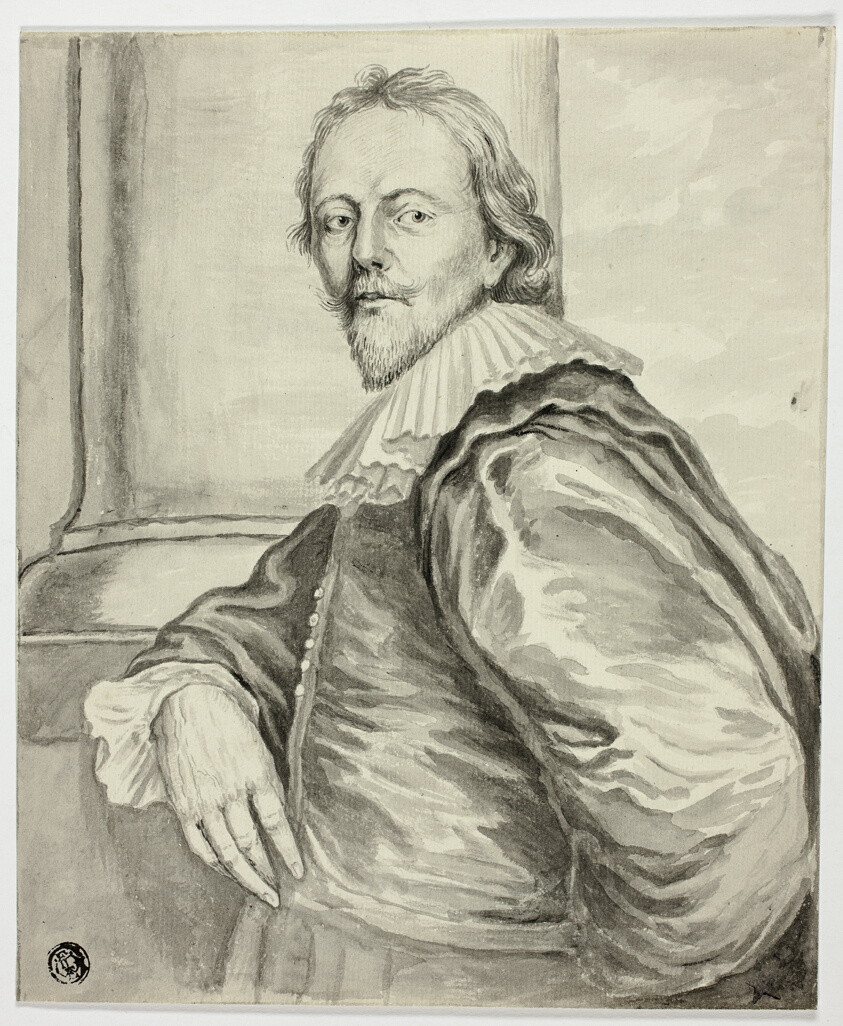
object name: Drawing and Watercolor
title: Adam de Coster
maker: After Anthony van Dyck; Flemish, 1599-1641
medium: Brush and black and gray wash, on ivory laid paper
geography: Flanders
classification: ink or chalk wash; drawings (visual works); prints and drawing